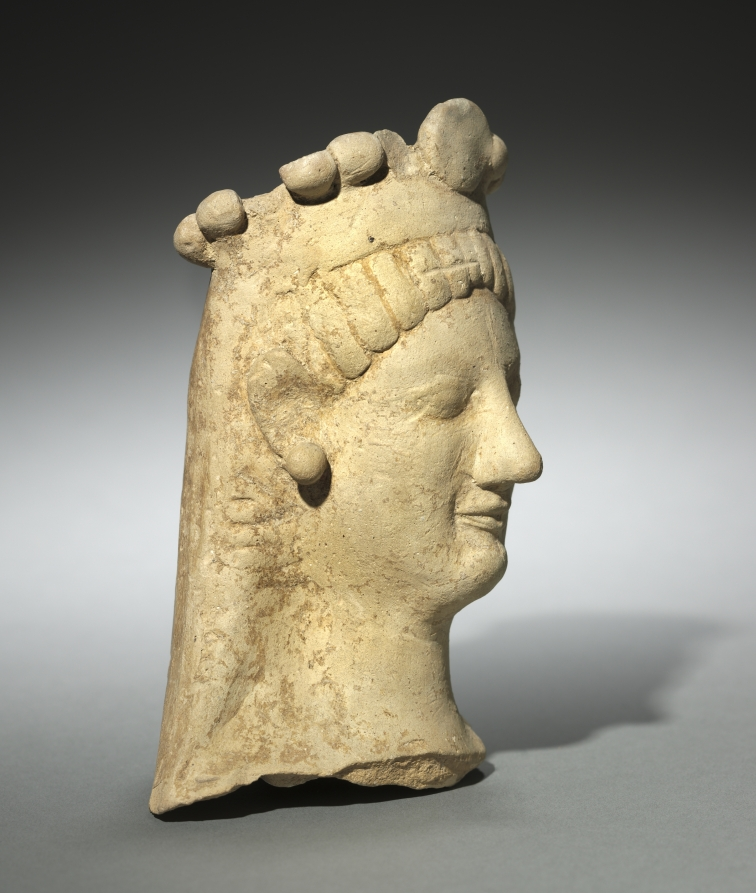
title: Woman's Head with Crown and Earrings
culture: Greece, Sicily(?)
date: 600–475 BCE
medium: terracotta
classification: Sculpture